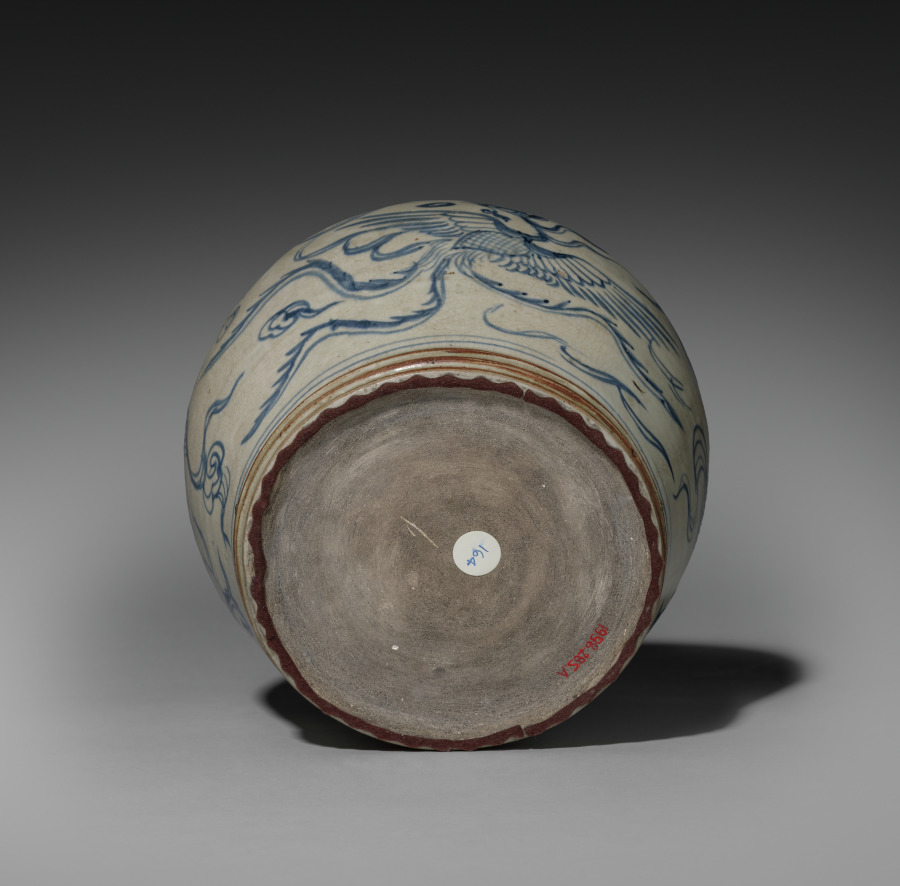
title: Covered Jar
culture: Vietnam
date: 1500s–1600s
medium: stoneware with blue and white decoration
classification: Ceramic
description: This stoneware ginger jar is decorated with a blue and white phoenix among clouds (a symbol of longevity) and floral motifs.